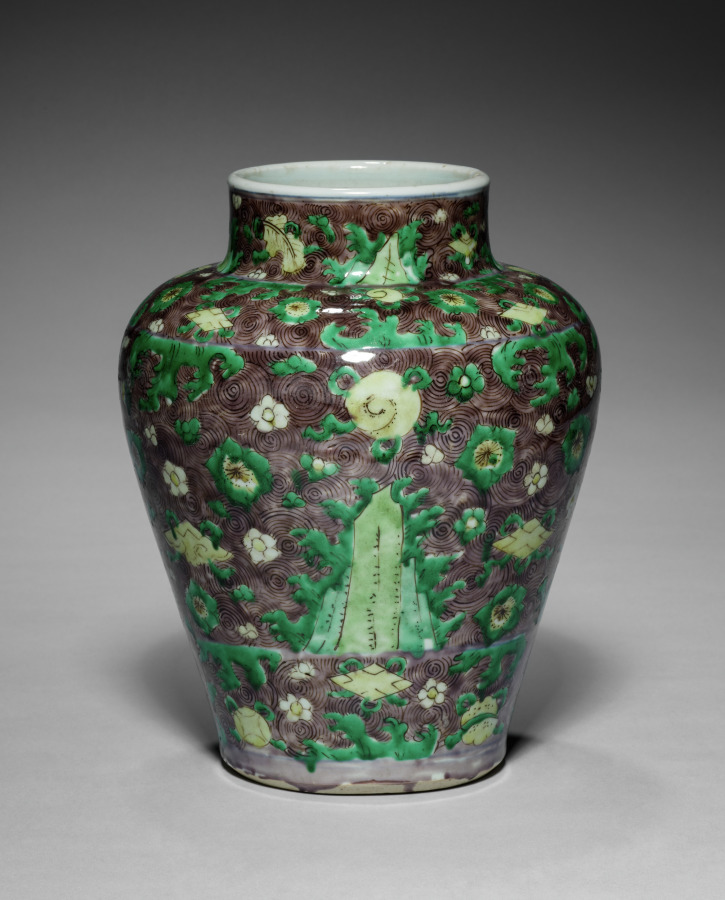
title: Baluster Jar and Cover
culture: China, Jiangxi province, Jingdezhen kilns, Ming dynasty (1368–1644) or Qing dynasty (1644–1911)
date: 1600–1650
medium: Porcelain with wucai (five-color) enamels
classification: Ceramic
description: The central motif on this jar is a mountain emerging from the sea, symbolizing Mount Sumeru in Buddhist cosmology, and representing the central axis in the universe in Daoism. White cherry blossoms floating on the wavy ground are surrounded by auspicious symbols such as the coin for wealth and the lozenge for victory. The yellow knob on the jar’s cover depicts a cherry blossom. Other fortuitous motifs—such as the leaf of protection, the pearl to grant wishes, the stone chime for celebration, rocks symbolizing longevity—also decorate the lid. While most jars have lost their covers over time, this jar retains its original lid.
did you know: The waves are depicted in a rich aubergine, or purple, glaze.